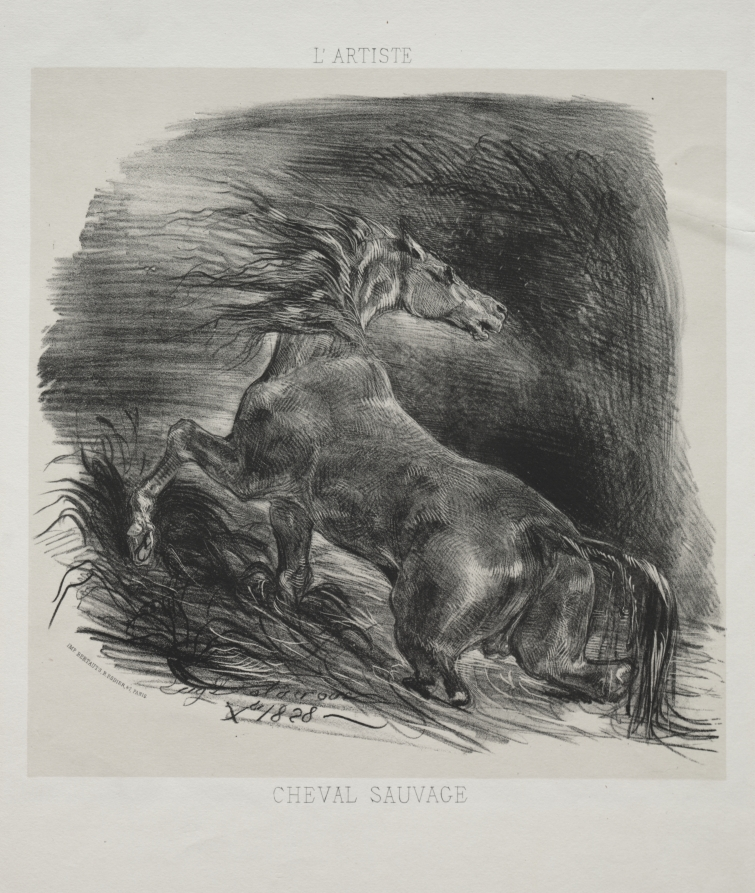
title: The Wild Horse, or Frightened Horse Leaving the Water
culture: France, 19th century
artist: Eugène Delacroix (French, 1798–1863)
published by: L'Artiste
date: 1828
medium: lithograph with beige tint stone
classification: Print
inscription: signed and dated, lower center, in stone: E. Delacroix Xe 1828; upper center, printed: L'Artiste; lower left, printed: Imp. Bertauts, R. Rodier, 47, Paris